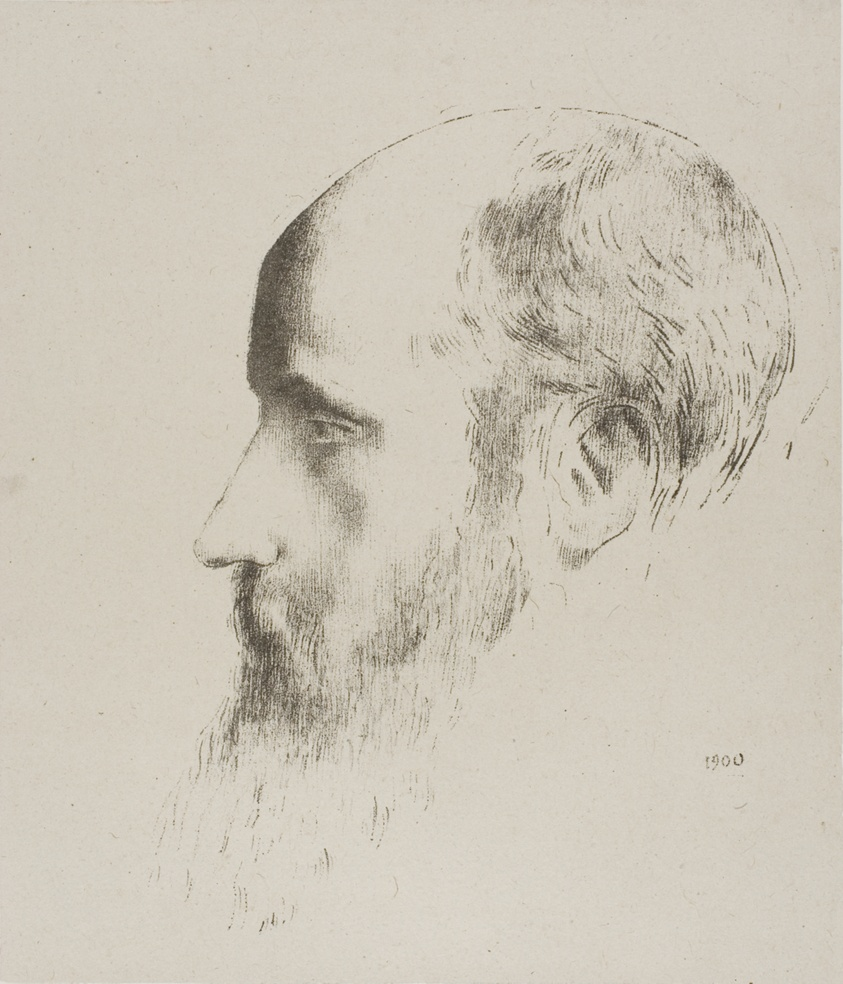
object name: Print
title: Edouard Vuillard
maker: Odilon Redon (French, 1840-1916)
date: 1900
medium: Lithograph in black on light gray China paper laid down on white wove paper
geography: France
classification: lithograph; print; prints and drawing; paper